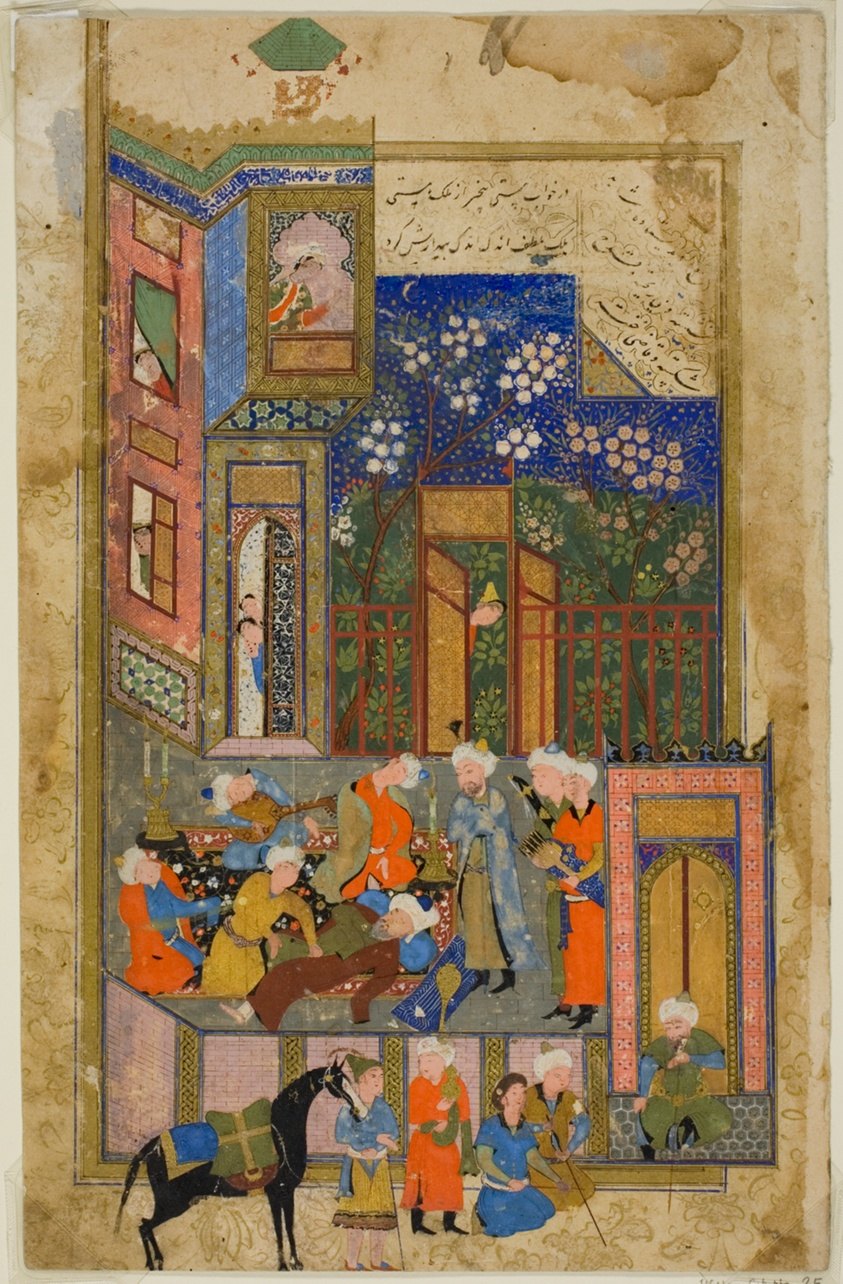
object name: Miniature Painting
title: Judge (Qazi) of Hamadan in a Drunken State, a scene from the Gulistan of Sa'di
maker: Uzbekistan; Bukhara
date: about 1550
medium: Opaque watercolor with gold on paper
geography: Bukhara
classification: gouache; painting; asian art